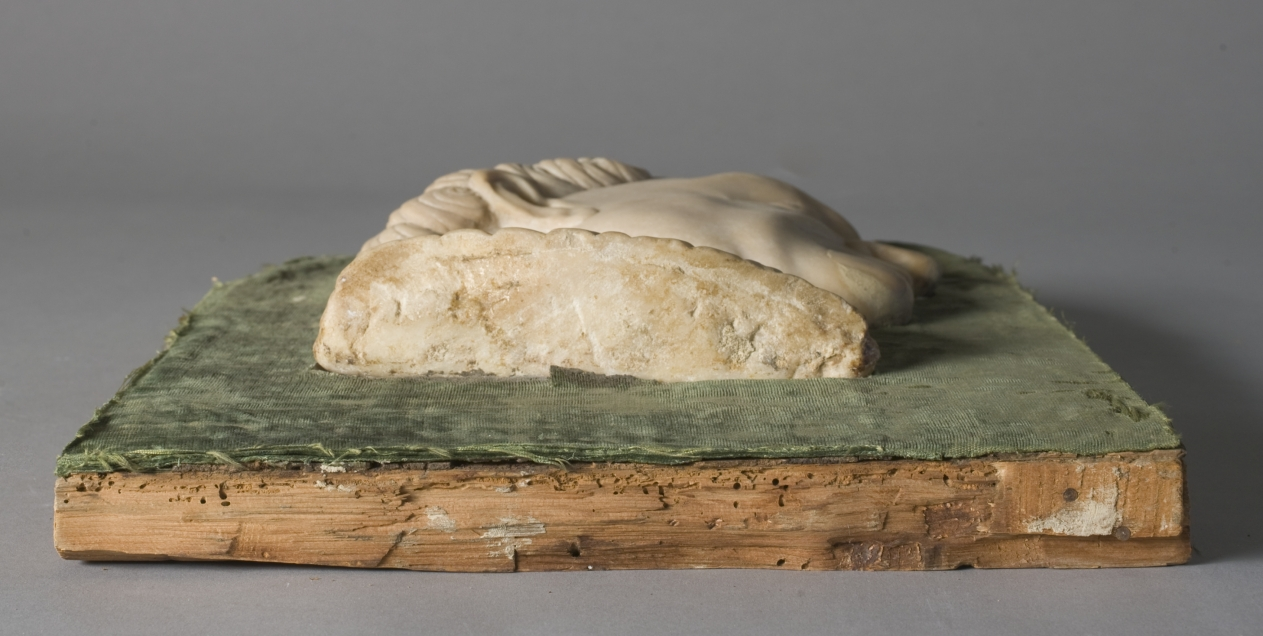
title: Portrait of Francesco Sforza and Frame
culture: Italy, Lombardy, 15th century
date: 1450–1499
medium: marble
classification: Sculpture